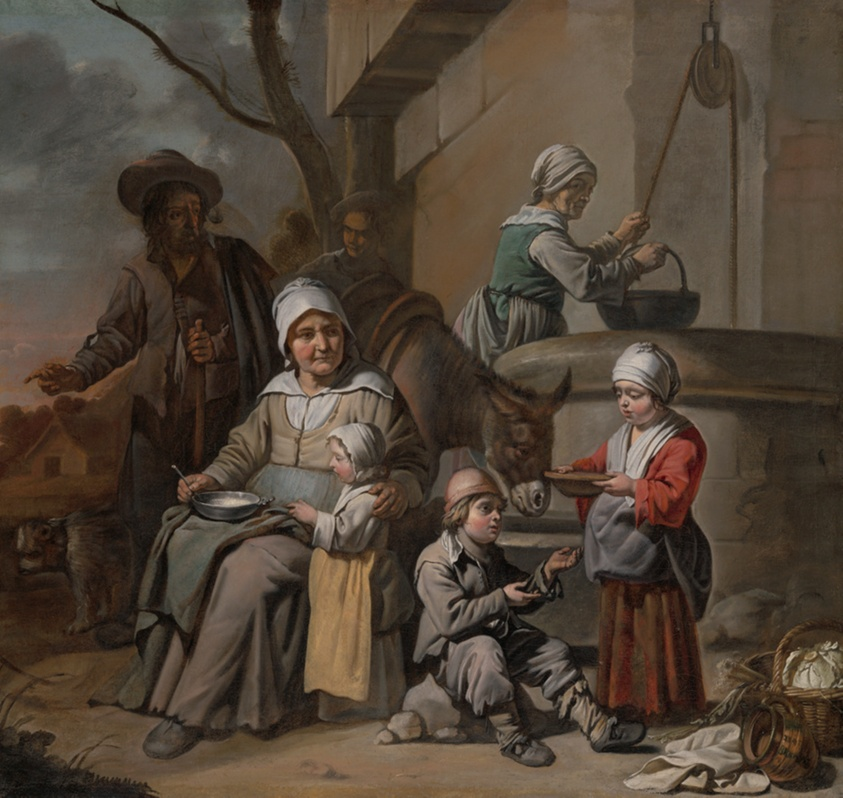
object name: Painting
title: Peasant Family at a Well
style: 17th Century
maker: The Master of the Children's Caps (Le Maître aux Béguins; French, 17th century)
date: 1650/60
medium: Oil on canvas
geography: France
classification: oil on canvas; french; oil paintings (visual works); paint; painting; european painting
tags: family, women, woman with children, woman, water, trees, sons, poverty, plates, peasants, men, man, hat, girls, girl, food, fathers, families, donkeys, dogs, dog, dining, daughters, children, buildings, building, boys, bowl, basket, animals, Century of Progress, world's fairs, Chicago World's Fairs